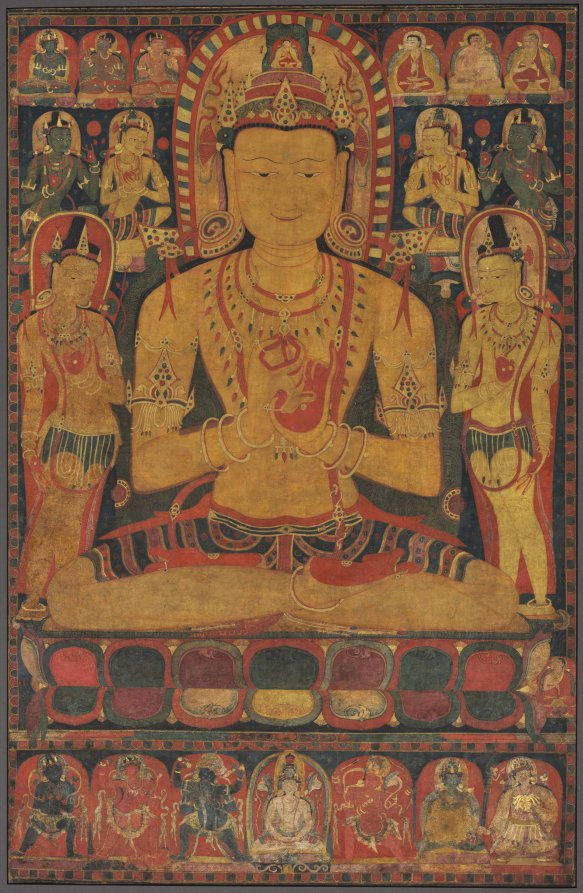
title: Tantric Buddha Vairochana as Vajrasattva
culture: Central Tibet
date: c. 1150–1200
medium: gum tempera, ink, and gold on cloth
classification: Painting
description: The seated Buddha dominating the composition is identified as Vairochana because of his hand gesture, the mudra communicating supreme enlightenment in which the index finger of one hand is grasped by the fingers of the opposite hand. His golden color and the tiny vajra—a six-pronged ritual object representing a thunderbolt—balanced on top of his finger suggest that he is in the guise of Vajrasattva, the summation of all enlightened beings. In his crown is the image of a monk, who is probably the guru of the donor, the small monastic figure at the lower right next to the lotus pedestal.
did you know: A mantra written behind the figures invokes their living presence in the thangka painting.